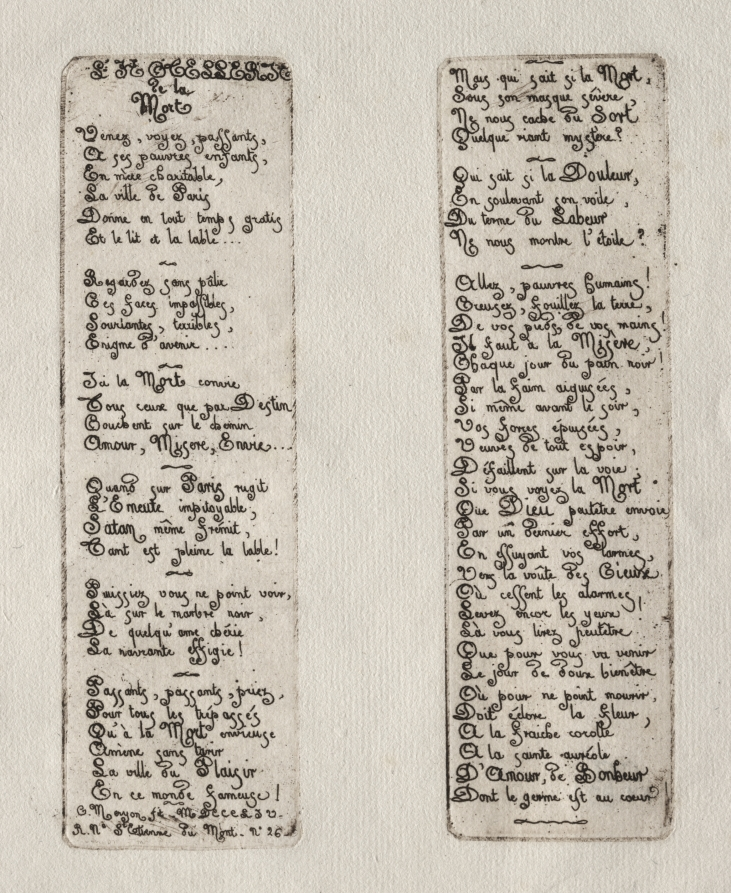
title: Etchings of Paris: Death's Hostel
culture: France, 19th century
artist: Charles Meryon (French, 1821–1868)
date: 1854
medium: etching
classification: Print